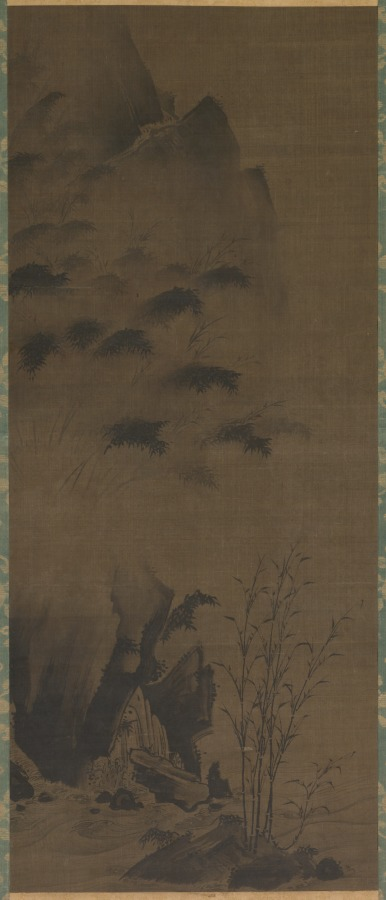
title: Bamboo in Rain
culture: Japan, Muromachi period (1392–1573)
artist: attributed to Genga (Japanese)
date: early 1500s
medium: hanging scroll; ink on silk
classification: Painting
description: East Asian paintings from China, Korea, and Japan were frequently conceived as sets of multiple images. These sets might have been composed for specific palace or temple rooms, or to portray a specific theme, such as the four seasons. Over time, the original intent of such sets is often lost through damage, changes in ownership, or a variety of other reasons. The identity of the artist can also be lost, but then, sometimes, retrieved. This pair of ink paintings has traditionally been labeled as Japanese and attributed to the 16th-century painter Genga. Since there are no seals or signature of the artist on the painting, this attribution was based on comparisons of brush style with paintings known to be by Genga. More recent study indicates that while the 16th century is an appropriate time frame for the pair, the precise cultural identity of the artist is not certain after all. The dark, eccentric shapes of the rocks and bamboo clusters and the dramatic tonal contrasts evident throughout the composition point to either Korean authorship or influence upon a Japanese painter of the period.